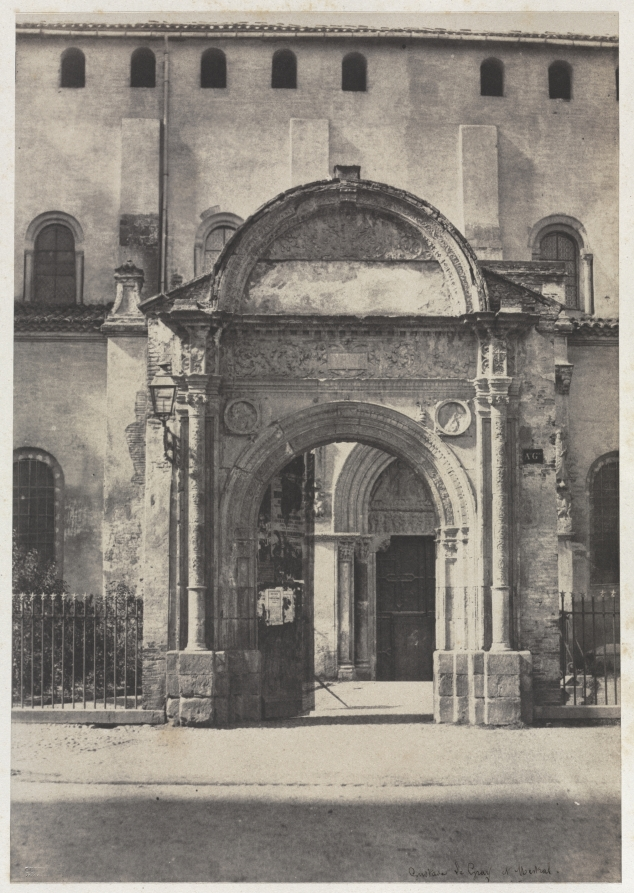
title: Porte Bachelier, Eglise Saint-Sernin, Toulouse (Haute-Garonne)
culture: France, 19th century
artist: and Auguste Mestral (French, 1812–1884)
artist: Gustave Le Gray (French, 1820–1884)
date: 1851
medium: Salted paper print from waxed paper negative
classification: Photograph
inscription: Written in black ink in lower right corner of recto: "Gustave LeGray & Mestral. Written in black ink on verso: "Reconaissance à L'Eglise de St.Sernin de Toulouse"